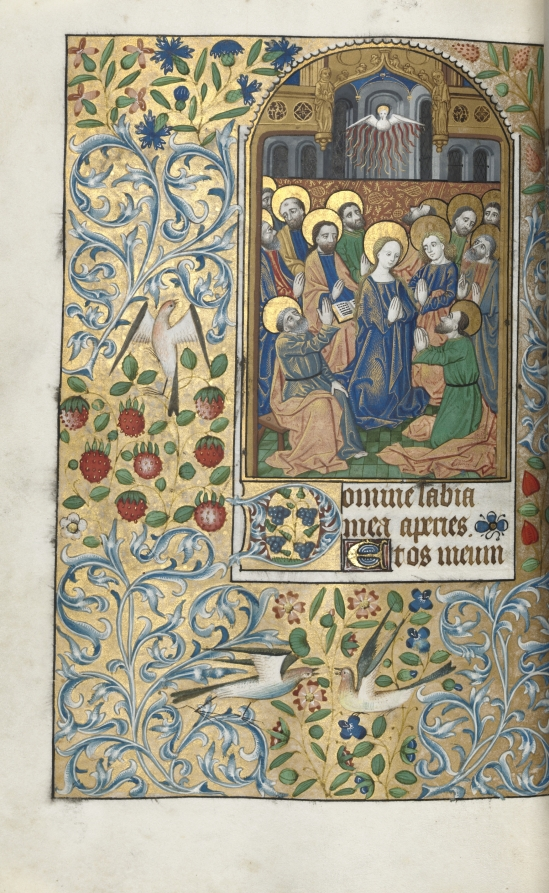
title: Book of Hours (Use of Rouen): fol. 99v, Pentecost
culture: France, Rouen, 15th century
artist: Master of the Geneva Latini (French, active Rouen, 1460–80)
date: c. 1470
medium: ink, tempera, and gold on vellum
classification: Bound Volume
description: In the late 1400s and early 1500s Rouen was an established and important center of book production. The city’s cathedral had a wealthy chapter that spent large sums of money to commission books and to maintain its extensive library. The stationers and booksellers would have likely been concentrated in or near the cathedral precinct. This artist, named after a manuscript now in Geneva, was Rouen’s principal illuminator during the second half of the 1400s.